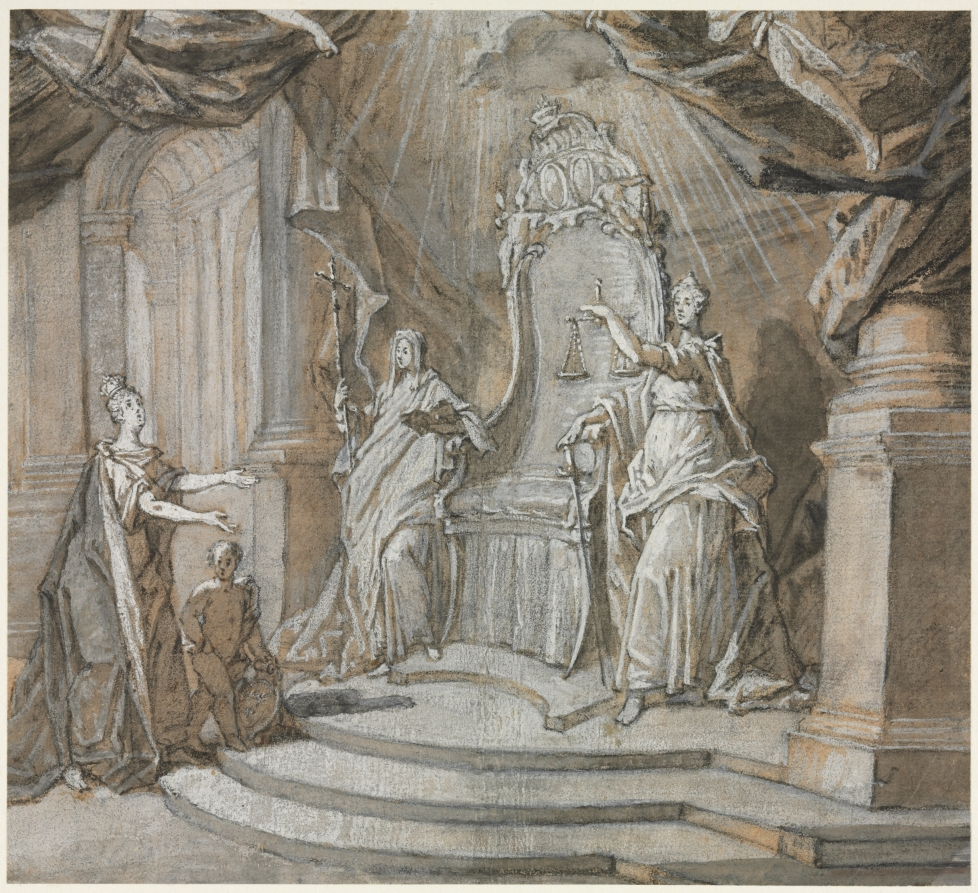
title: Madame de Maintenon Returning to the Catholic Church [1]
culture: France, 18th century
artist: Charles Dominique Joseph Eisen (French, 1720–1778)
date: 1700s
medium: black chalk and brown wash, heightened extensively with white (gouache) with graphite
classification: Drawing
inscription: Faint signature on smaller drawing, upper center within a cartouche: Eisen; on verso of each mount, inscribed in pencil: Charles D.J. Disen 1720-1778/Mme de Maintenon being received back into Catholic Church/Ex collection Marquis de Lagoy (1764-1819) Aix-en-Provence